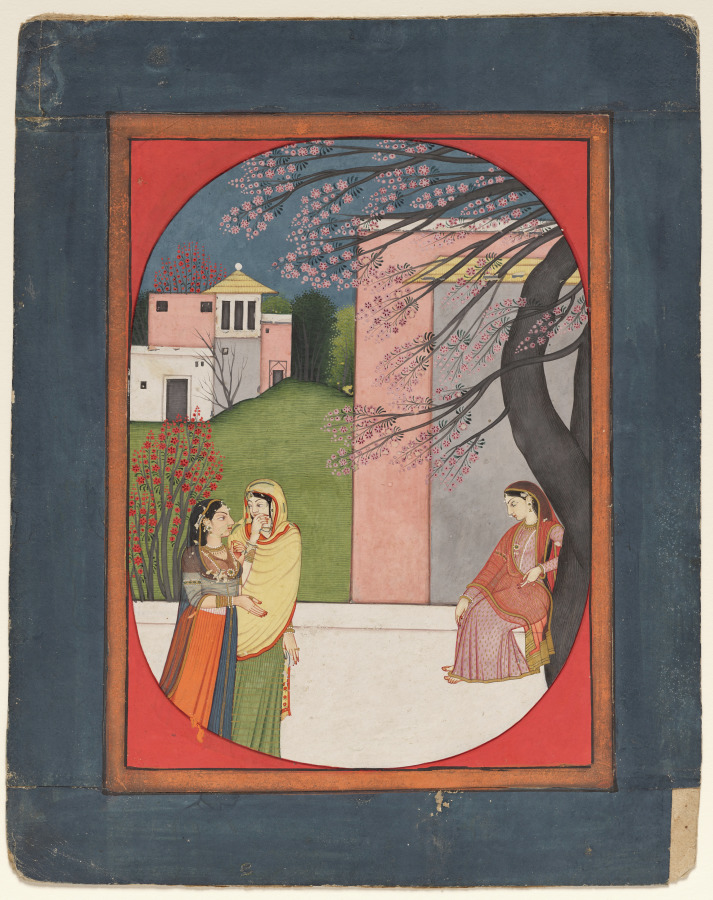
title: The lovelorn heroine, from a Sat Sai of Bihari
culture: Northern India, Pahari kingdoms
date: 1780–90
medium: Gum tempera and gold on paper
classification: Painting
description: The Sat Sai is a collection of poems mainly describing the beauty of women in a range of emotional states. The heroine of this poem sits against a tree that is in full flower, like her, but her lover is absent, and other girls walk by, gossiping. Not coincidentally, her dress matches the color of the blossoms, and no bees come to pollinate.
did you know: The Sat Sai was written for Raja Jai Singh I of Amber (r. 1625–67).